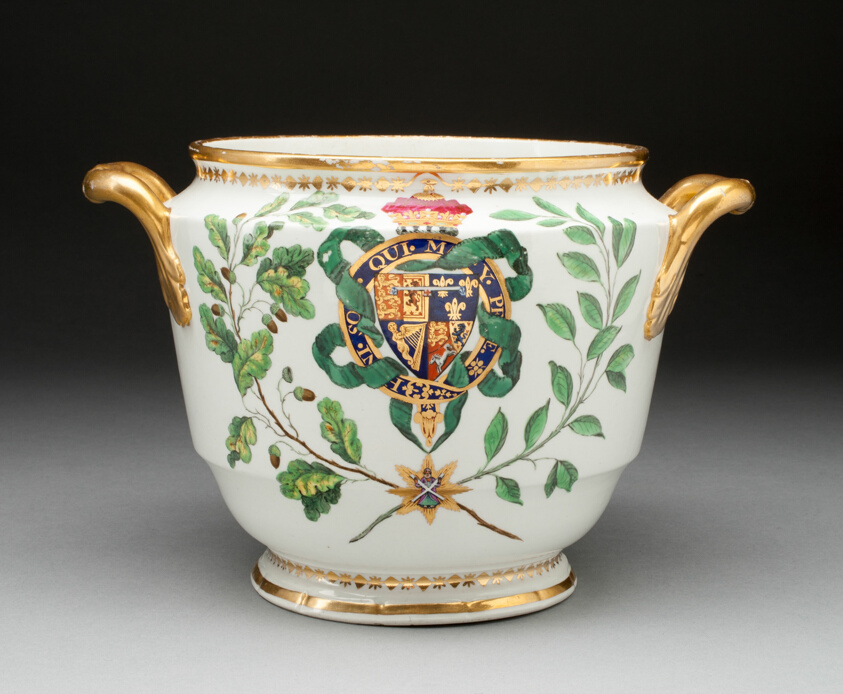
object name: Ceramics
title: Wine Cooler from the Duke of Clarence Service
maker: Worcester Porcelain Factory (Flight Period, 1783-1792); Worcester, England, founded 1751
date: 1789/90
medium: Soft-paste porcelain, polychrome enamels and gilding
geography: Worcester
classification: ceramics; european decorative arts; tableware; porcelain